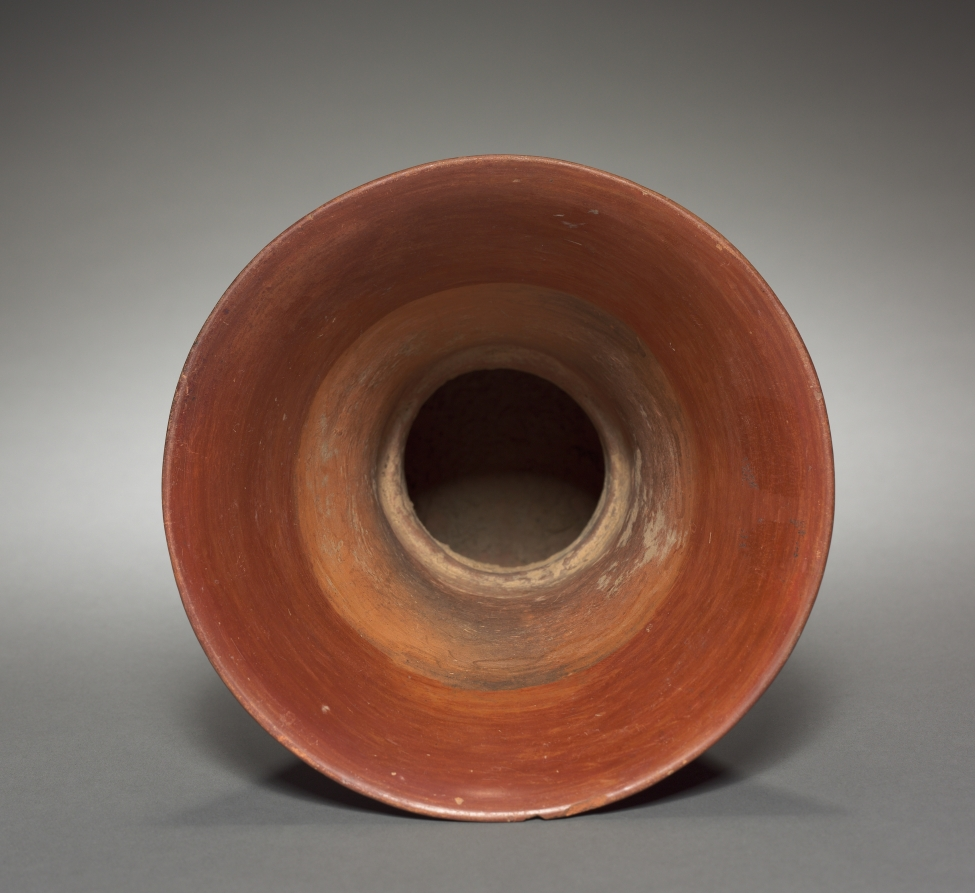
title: Kero (Waisted Cup)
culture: Bolivia, Cochabamba(?), Tiwanaku style, 400-1000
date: 400–1000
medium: earthenware with colored slips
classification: Ceramic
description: The kero is a distinctive Tiwanaku vessel form, imitated by the later Inka, who used the cups in political and religious ceremonies. It is assumed that the same was true at Tiwanaku, where impressive stone figures, perhaps rulers, hold keros as though they are emblems of authority. Perhaps, like the Inka, the Tiwanaku used keros to drink chicha, a corn beer shared to cement bonds of mutual obligation among allies.